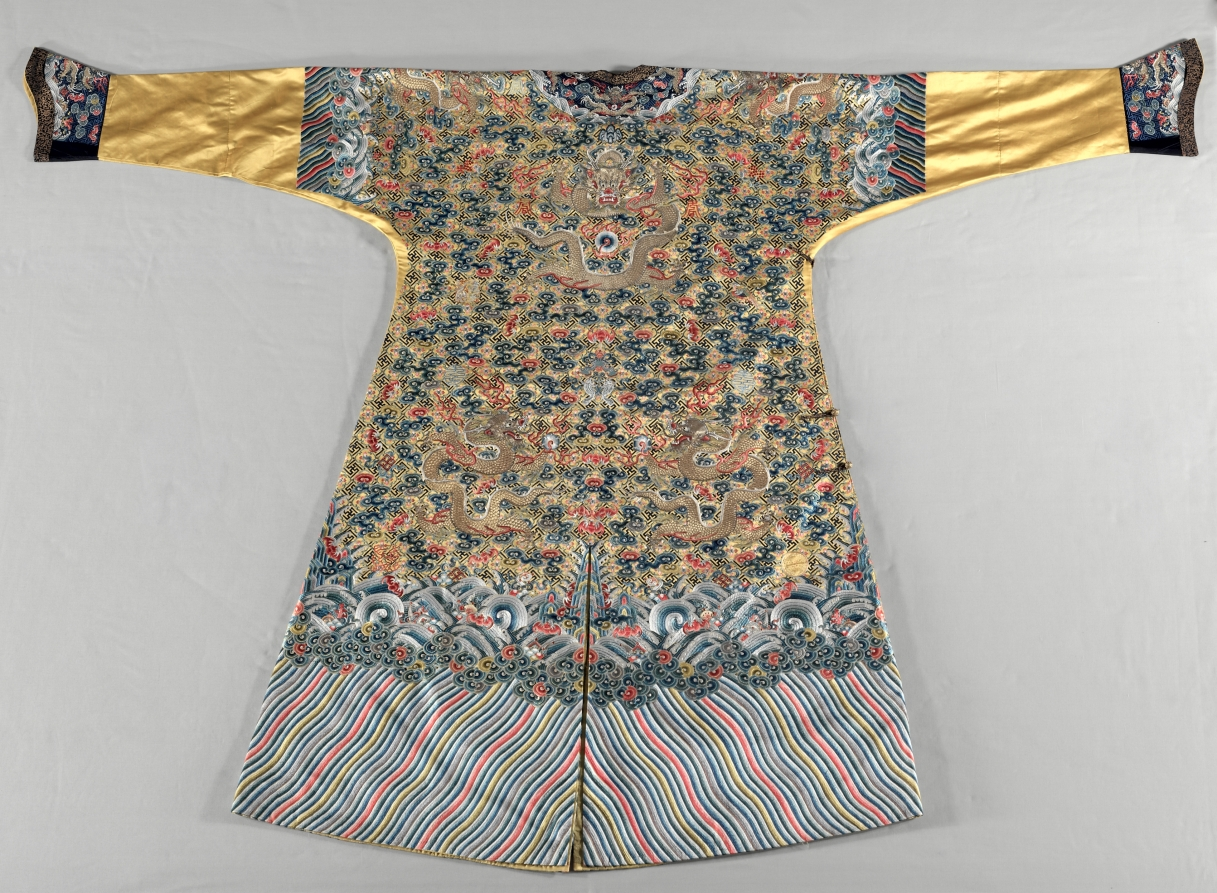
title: Semi-formal Court Robe (Jifu)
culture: China, Qing dynasty (1644–1911), Jiaqing period (1796–1820)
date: late 1700s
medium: Silk: satin weave; silk and metal thread: embroidery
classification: Garment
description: The lavishly embroidered motifs of dragons, clouds, waves, and rocks on this robe form a diagram that symbolizes the universe: the lower horizontal band of waves at the hem represents the oceans that surround the earth, while the prism-shaped rocks emerging from the waves at the sides, front, and back of the coat symbolize the earth. The cloud-filled firmament above the waves shows dragons—symbols of imperial authority. During the Qing dynasty, yellow indicated “imperial” and the color’s use in garments was reserved for the emperor and his consorts. The emperor would have worn this type of court robe at semi-official meetings at court but not when he performed the official state rituals.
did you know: Look for the red bats embroidered throughout the robe. They are lucky symbols, because the words for “bat” and for “luck” are homophones, both pronounced “fu."